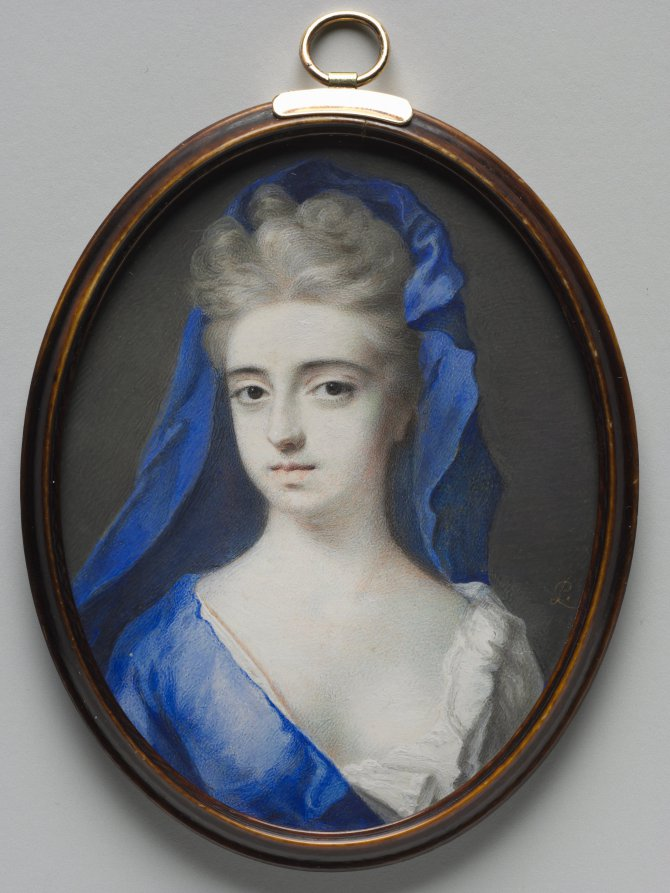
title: Portrait of a Woman in Blue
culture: England, early 18th Century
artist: Peter Cross (British, c. 1645–1724)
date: c. 1700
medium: watercolor on vellum in original ivory frame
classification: Portrait Miniature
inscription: signed right: PC [monogram]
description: Living in London, the youngest of seven children, Peter Cross was probably apprenticed to a limner following the death of his wealthy father. His first miniatures date from around 1661, and he remained active until his death, ushering the medium into the eighteenth century; the greatest British miniaturists working during his lifetime, all had died or ceased to work by 1700. Although ivory had been adopted as a support for British miniature painting a decade before his death, Cross exclusively used the older medium of vellum adhered to card. The artist was also an avid collector, assembling an impressive group of miniatures that included at least twelve works by his neighbor Samuel Cooper. This collection was sold in 1722 at Cross’s house in Covent Garden. Cross’s style is distinguished by a fi ne stippling of colors that combine to create soft, voluminous hair and pale flesh tones. His later works tend to leave the prepared white ground of the vellum bare—coincidentally, a strategy that was adopted by artists painting miniatures on ivory to exploit the support’s translucence. The details of his early instruction are still obscure, but some scholars have postulated that Cooper trained Cross, whereas others note a greater resemblance to the style of Hoskins, and still others detect a similarity to French stippling and suggest that he may have been trained overseas. The artist depicted the unknown sitter almost full face before a plain gray background with her head turned slightly to the right. She dons a white gown trimmed with ruffles at the neckline and a bright blue mantle over her right shoulder. Her powdered hair is swept up and loosely covered either by the blue mantle or a scarf of the same color.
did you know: This miniature is in its original ivory frame, stained a mottled brown to imitate tortoise shell.